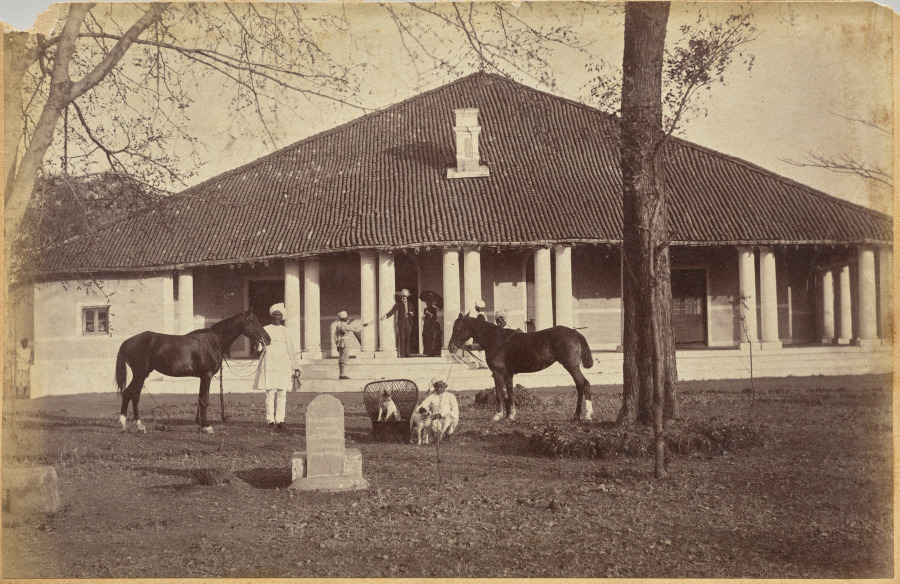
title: Captain Falkner's Bungalow, Neemuch (recto, top)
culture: India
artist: Raja Deen Dayal (Indian, 1844–1905)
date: c. 1882–87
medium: albumen print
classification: Photograph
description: These photographs are part of an album, now disassembled, of around 105 photographs taken in India between 1885 and summer 1887 that provide glimpses into the lives of the British colonial elite and royal and upper-class Indians. The museum holds another group of 37 pictures from this album (2016.266), which was probably commissioned by a British civil servant visiting or working in India around 1888 as a personal souvenir of his experiences there.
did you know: Raja Deen Dayal is regarded now, and was considered during his lifetime, to be India’s most important 19th-century photographer.